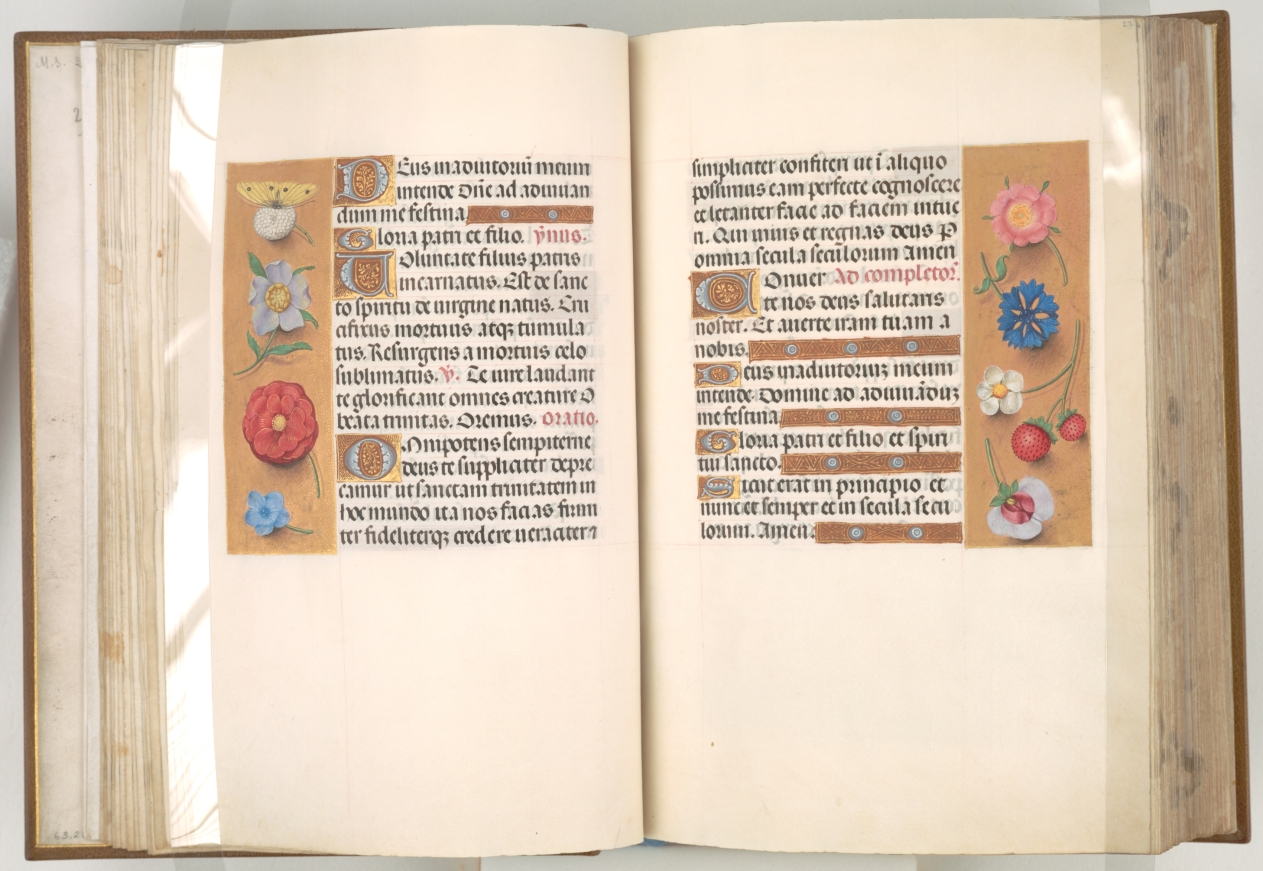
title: Hours of Queen Isabella the Catholic, Queen of Spain: Fol. 22r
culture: Flanders, Ghent and Bruges, late 15th century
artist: Master of the First Prayerbook of Maximillian (Flemish, c. 1444–1519)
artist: and Associates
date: c. 1500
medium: ink, tempera, and gold on vellum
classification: Bound Volume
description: This manuscript was illuminated by a circle of at least five highly organized manuscript painters active in the Flemish cities of Ghent and Bruges. The principal illuminator was Alexander Bening, who painted the majority of the book's miniatures. Manuscripts produced by this circle of artists are renowned for the decoration of their borders, which typically feature a rich variety of realistically-painted flowers, birds, and butterflies. This prayer book, called a book of hours, was intended not for a cleric, but for the private devotions of a lay person-in this case, Isabella the Catholic, Queen of Spain (1451-1504). Isabella's coat of arms embellishes the book's frontispiece. It is unlikely that the book was commissioned by the Queen herself; rather, she probably received it as a diplomatic gift from someone courting her patronage, perhaps Cardinal Francisco Jimenez de Cisneros. A Franciscan friar, Jimenez was dependent upon Isabella for his advancement, first to the post of Queen's confessor in 1492, and then to Archbishop of Toledo in 1495.